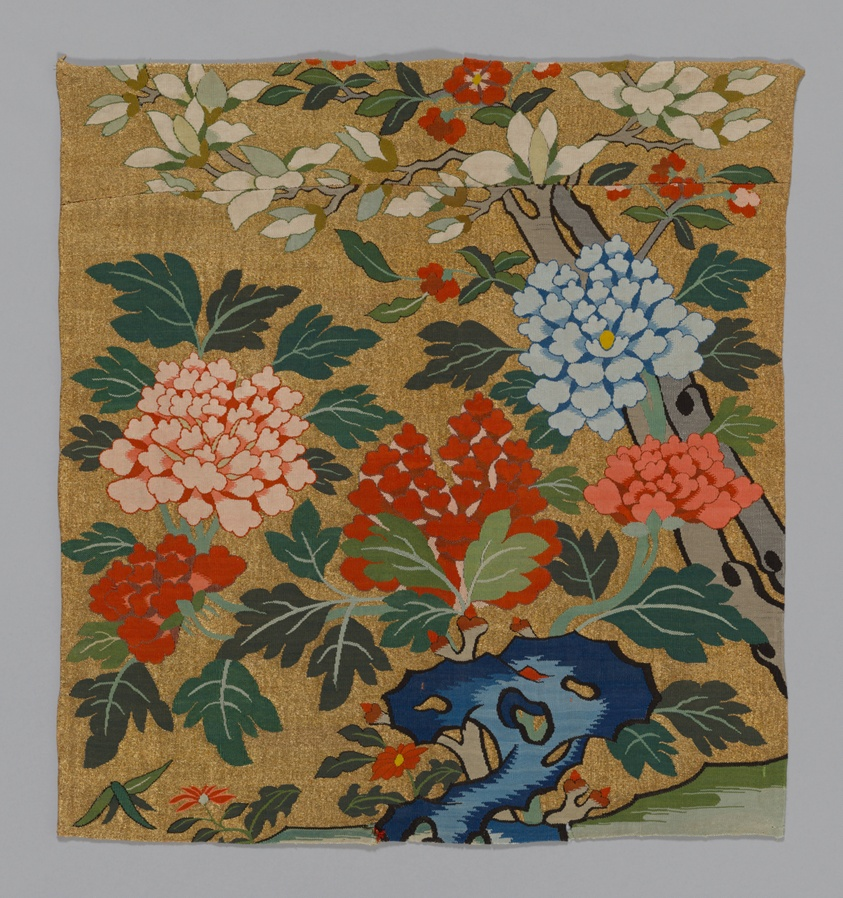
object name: Textile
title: Fragment (From a Chair Panel (K’assu)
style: qing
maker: China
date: Qing dynasty (1644–1911), 1654/1772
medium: Silk, gold-leaf-over-lacquered-paper-strip-wrapped silk; slit tapestry weave with outlining wefts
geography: China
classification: weaving - tapestry; textile